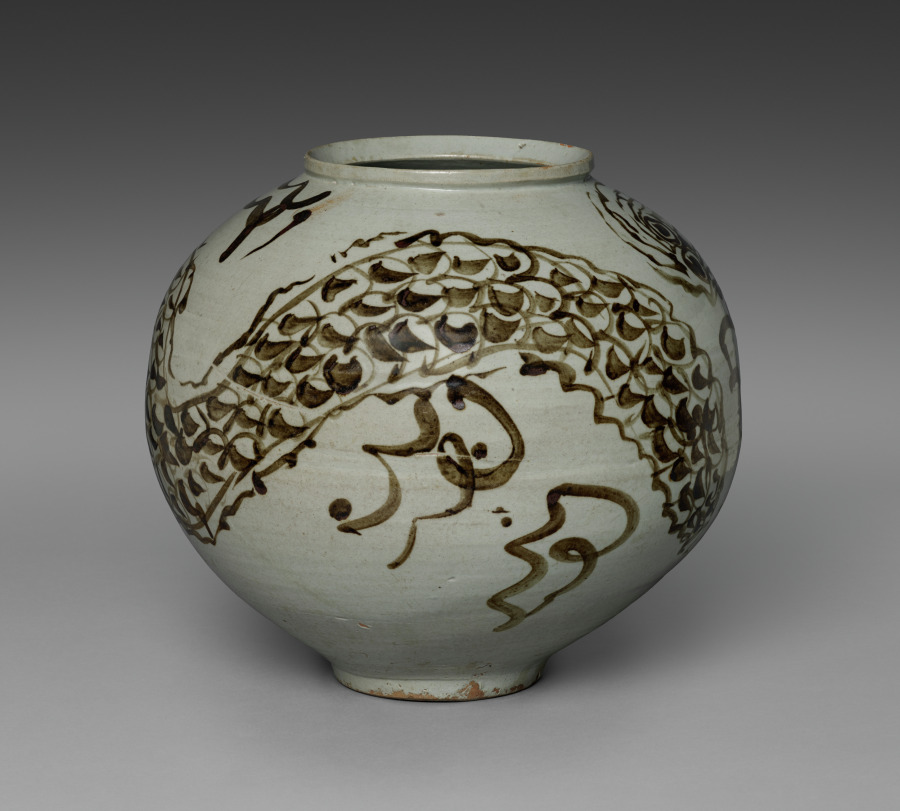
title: Jar with Dragon and Clouds Design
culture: Korea, Joseon dynasty (1392–1910)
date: late 1600s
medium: porcelain with underglaze iron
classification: Ceramic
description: In traditional Korean art, dragons were used as an emblem of royalty. Over centuries, the ways of depicting this powerful mythical creature varied in response to artistic trends and socioeconomic changes. Here, the artist imagined with free-flowing calligraphic brushstrokes a whimsical dragon with bulging eyes who wraps his scaled body around the vessel. This piece was acquired from the London Gallery in Tokyo, Japan. Its owner, Tajima Mitsuru (born about 1936) is regarded as one of the pioneering Japanese art dealers to cultivate lasting relationships directly with collectors and museums in the United States.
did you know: A mythical creature believed to have the power to make rain, the dragon is a prominent symbol of rulers in premodern East Asia; the image of dragons was used exclusively for the king's paraphernalia.